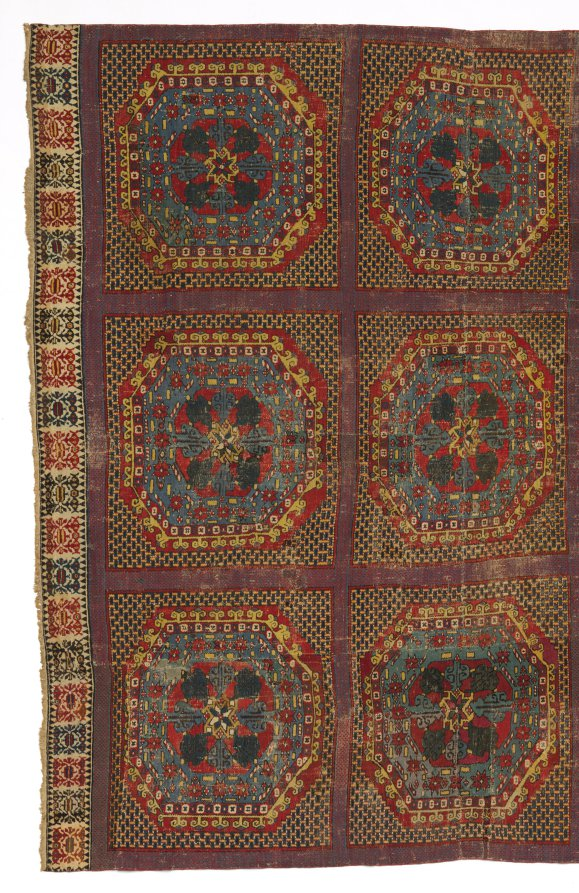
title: Spanish Carpet with a Turkish Pattern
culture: Spain, Alcaraz?, Mudejar, 15th century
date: c. 1450–1500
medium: wool, knotted pile: Spanish knot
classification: Carpet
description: Muslim weavers in Spain manufactured colorful woolen carpets with patterns derived from native Iberian designs, luxury silks, and imported Turkish carpets, such as this rare example. It is the only known carpet with this pattern of octagons framing a radiating central star. It is related to so-called large-pattern Holbein carpets, named after the Flemish painter Hans Holbein the Younger (1497-1543) who represented them in his paintings. This relatively well preserved 15th-century carpet is said to have come from a convent in Spain.